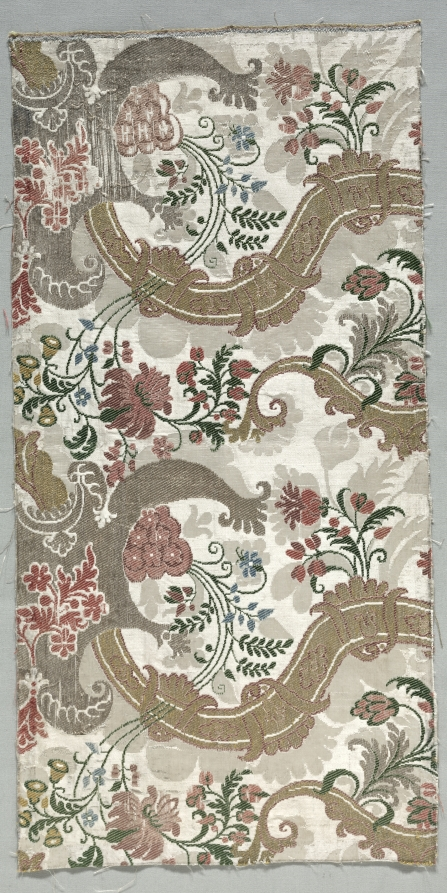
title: Length of Silk Textile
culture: Italy, 18th century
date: 1700s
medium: damask, brocaded; silk and metal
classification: Textile